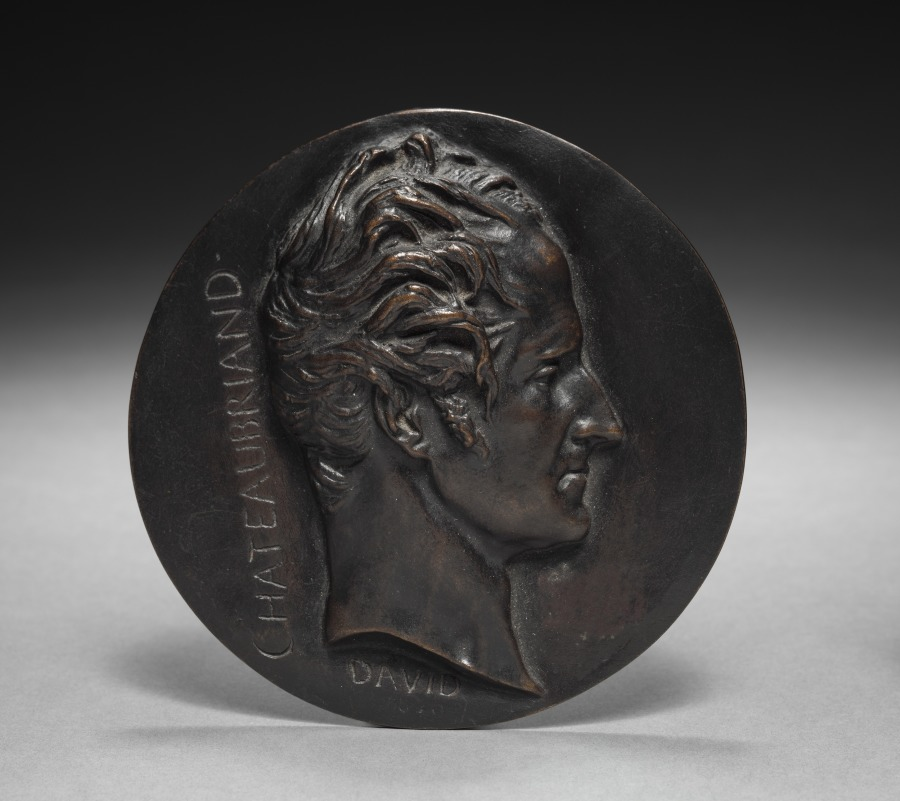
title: Chateaubriand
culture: France, 19th century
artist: Pierre-Jean David d'Angers (French, 1788–1856)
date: 1820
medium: bronze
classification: Sculpture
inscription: inscribed on the left with marks made in the model: "CHATEAUBRIAND." Also marked in the mold under the neck: "DAVID / 1820." There is an illegible mark on the reverse.